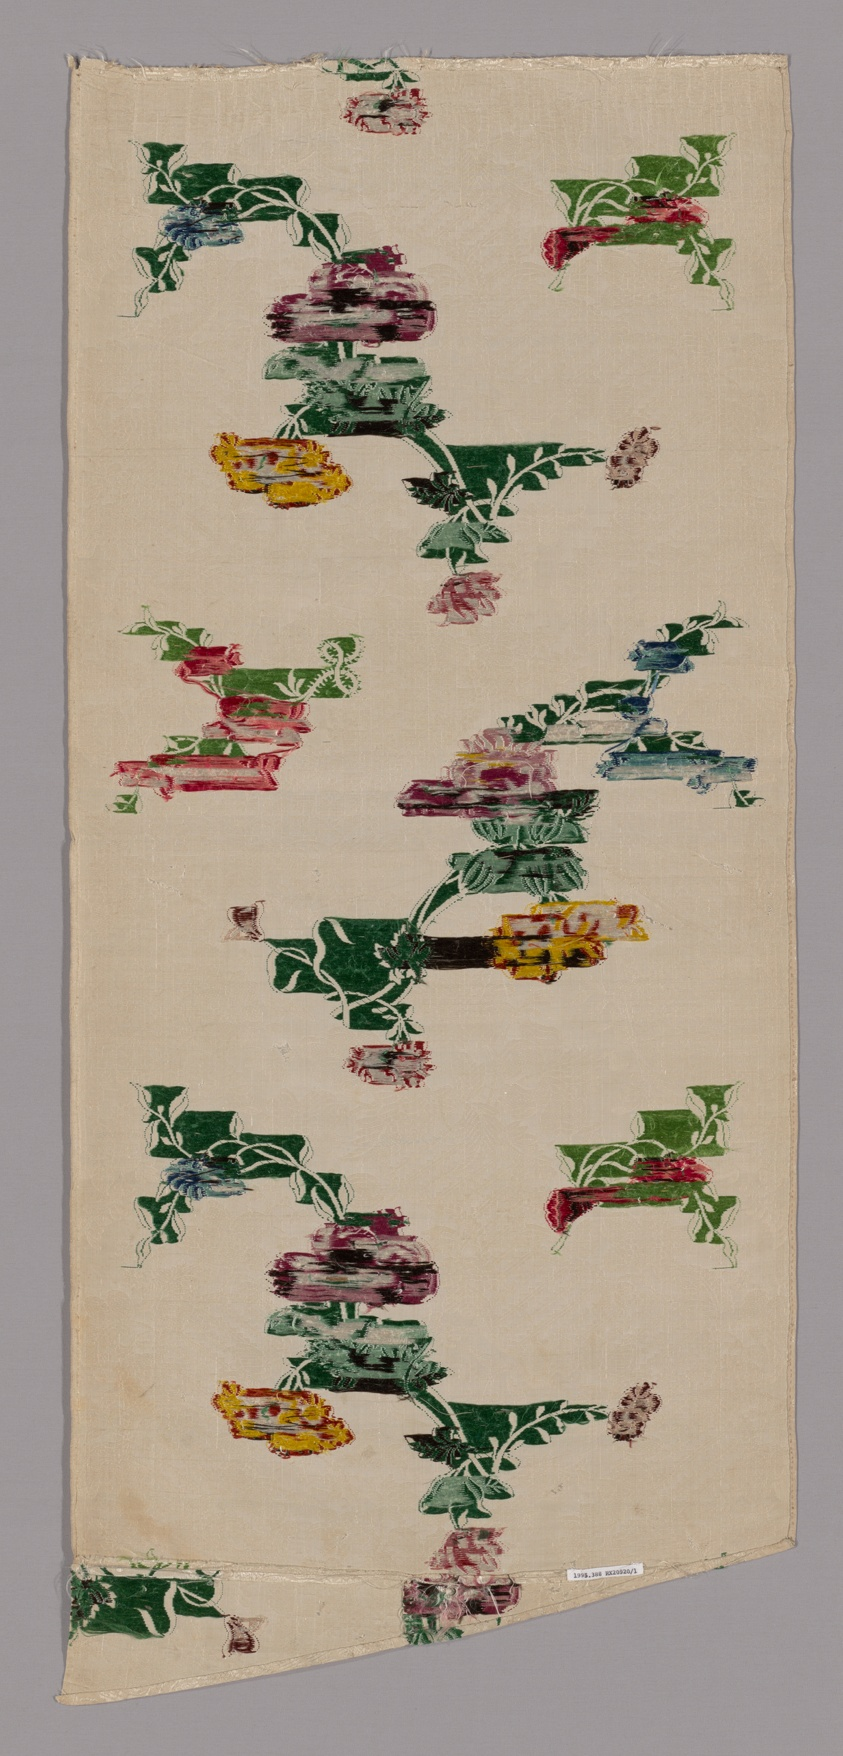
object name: Costume and Accessories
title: Skirt Panel for a Woman's Sack Gown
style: 18th Century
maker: Designed by Anna Maria Garthwaite (English, 1690–1763); Woven by Daniel Vautier (English, active 1741–51); Spitalfields, England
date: Design March 1, 1749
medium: Silk, plain weave foundation with supplementary patterning warps and supplementary brocading wefts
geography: England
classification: garment; weaving; textile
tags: flowers, foliage, floral motifs, vines, botanical/floral